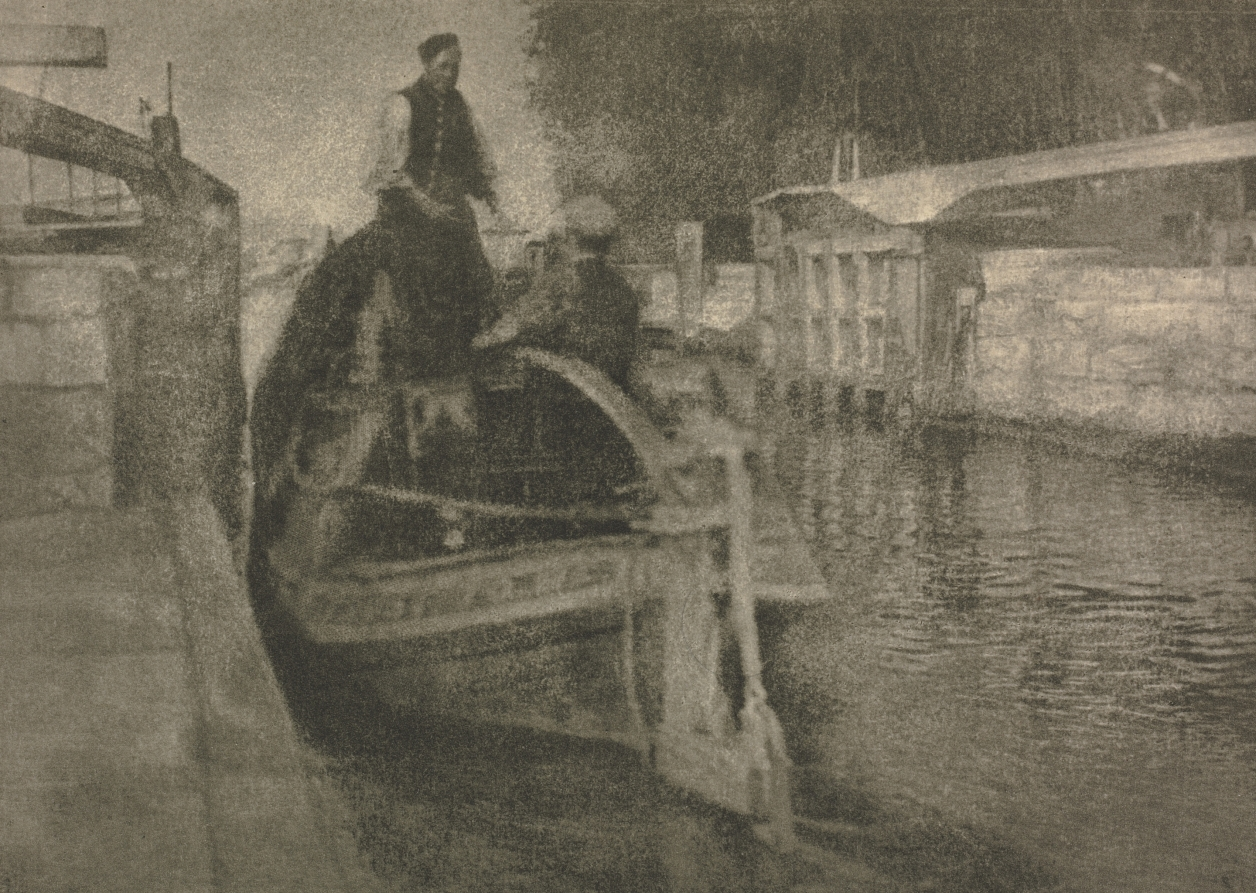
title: Camera Work: A Thames Locker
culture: England, 20th century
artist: George Davison (British, 1856–1930)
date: 1907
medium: photogravure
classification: Bound Volume